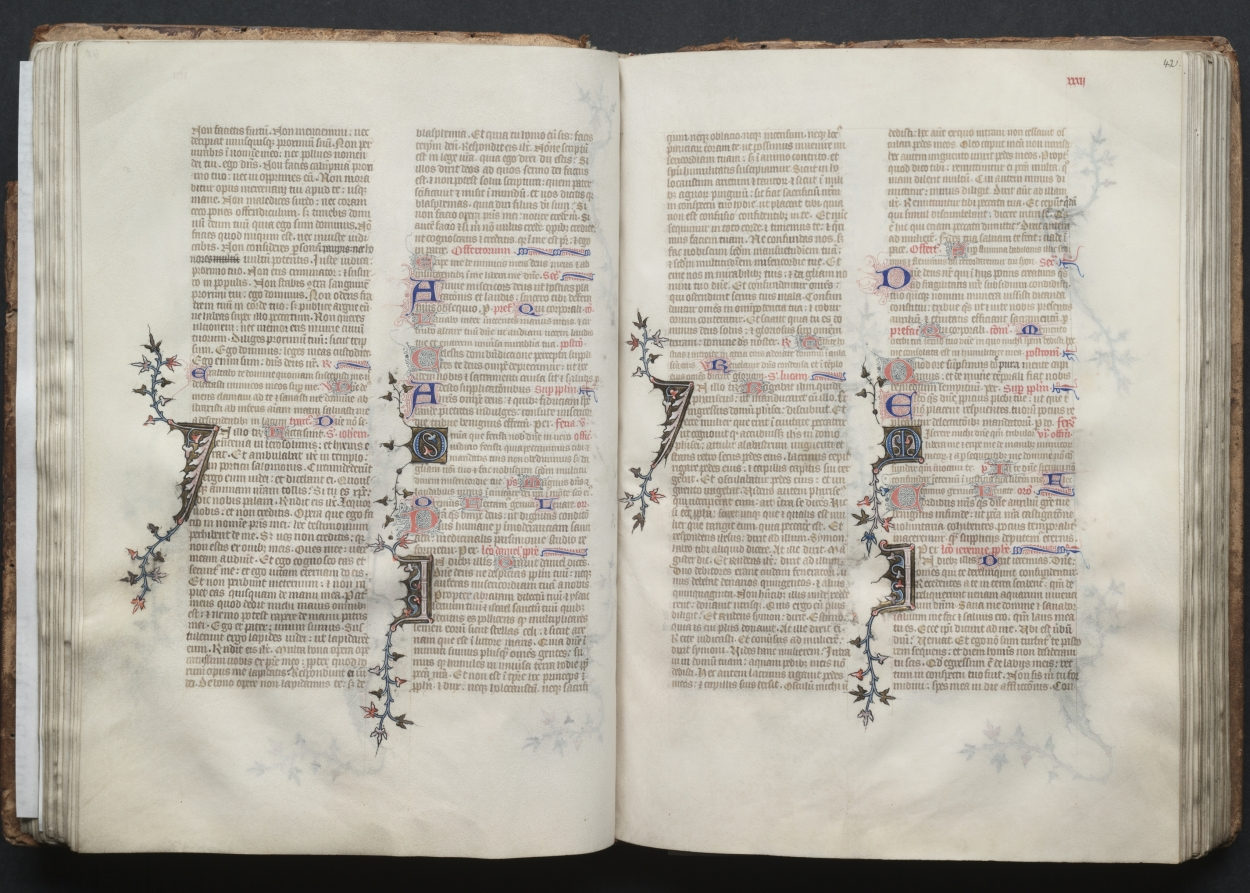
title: The Gotha Missal: Fol. 41v, Text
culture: France, Paris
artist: Master of the Boqueteaux (French)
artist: and Workshop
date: c. 1375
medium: ink, tempera, and gold on vellum; blind-tooled leather binding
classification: Bound Volume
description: The style and quality of this manuscript's decoration is typical of deluxe Parisian books made for aristocratic or royal patrons. Most of the book's decoration appears to be the work of the Master of the Boqueteaux, an artist active at the court of King Charles V (died 1380). His style was apparently shared by a number of book illuminators working in and around Paris. It is very possible that the Gotha Missal belonged to Charles V, but is not provable because the manuscript has no royal portraits and lacks a colophon. Given the book's magnificent decoration, however, it would seem that it was produced for a Valois prince, if not for the king himself. The manuscript receives its name from the German dukes of Gotha, its later owners.